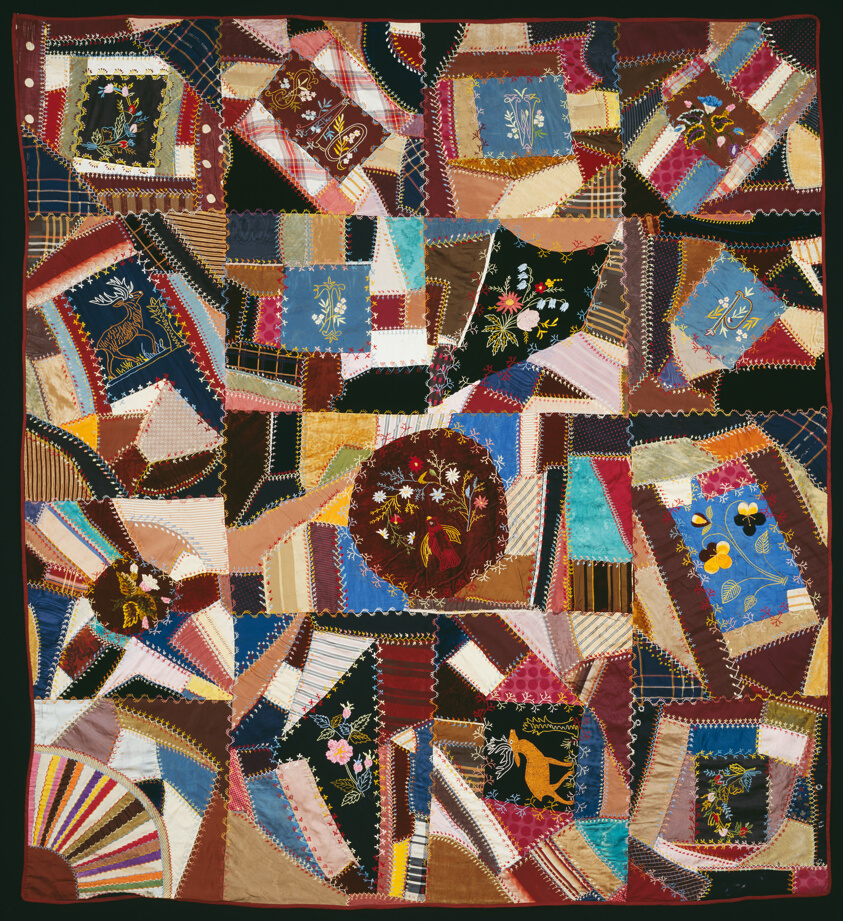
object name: Textile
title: Bedcover (Crazy Quilt)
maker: United States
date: 1885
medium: Silk and cotton, pieced plain, twill, satin and satin damask weaves; some with supplementary patterning warps or wefts; some self-patterned; some with supplementary pile warps forming cut solid velvet, cut voided velvet, and uncut voided velvet; some painted or warp painted (chiné); some "watered" (moiré); appliquéd with silk and cotton, plain weave with supplementary pile warps forming cut solid velvet; embroidered with silk and silk chenille yarns in buttonhole, detached chain, feather, double feather, herringbone, satin, stem and straight stitches; edged with silk, 2:1 twill weave; backed by cotton, 2:1 twill weave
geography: United States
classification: textile; needlework - quilt